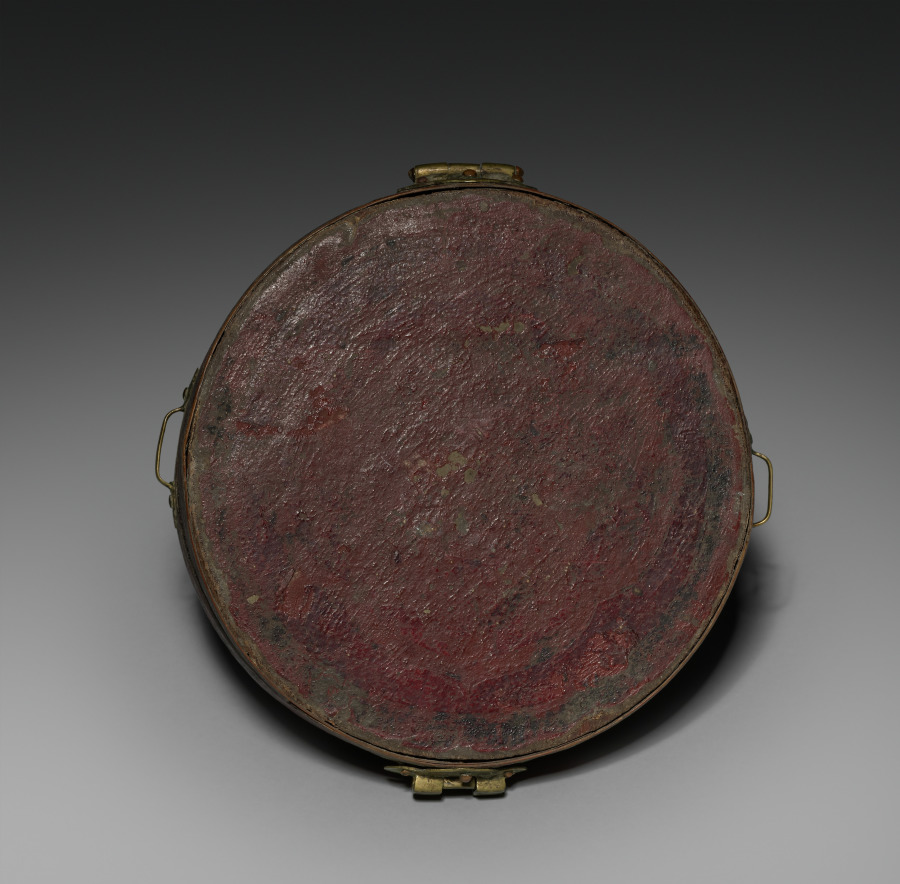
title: Stem Cup with Buddhist Emblems (case)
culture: China, Yuan dynasty (1271-1368)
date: 1300s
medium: wicker and wood with metal fittings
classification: Miscellaneous